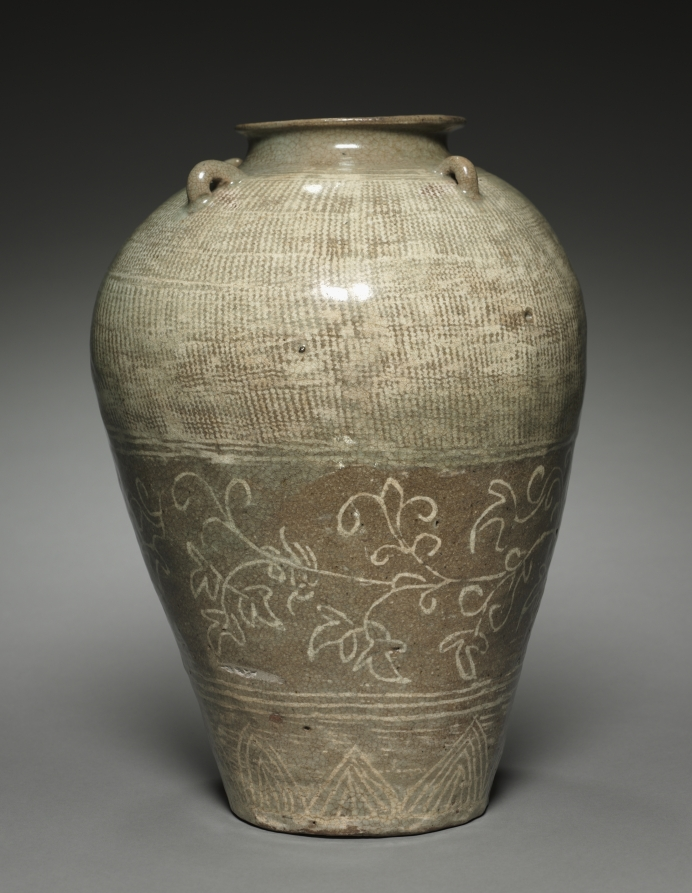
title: Jar with Scroll Design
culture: Korea, Joseon dynasty (1392–1910)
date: 1400s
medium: Buncheong ware with incised, stamped, and slip-inlaid decoration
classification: Ceramic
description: In premodern Korea, a newborn baby’s umbilical cord and placenta were believed to be a symbol of the life force of the fetus and thus kept in a specially arranged burial site. This jar was made exclusively for burying a placenta, a custom practiced by aristocratic families in Korea in the belief that it would bring happiness to the child.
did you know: The tiny ear-like handles located around the jar's shoulder allowing string to pass through were used to keep the lid (now missing) tightly closed.